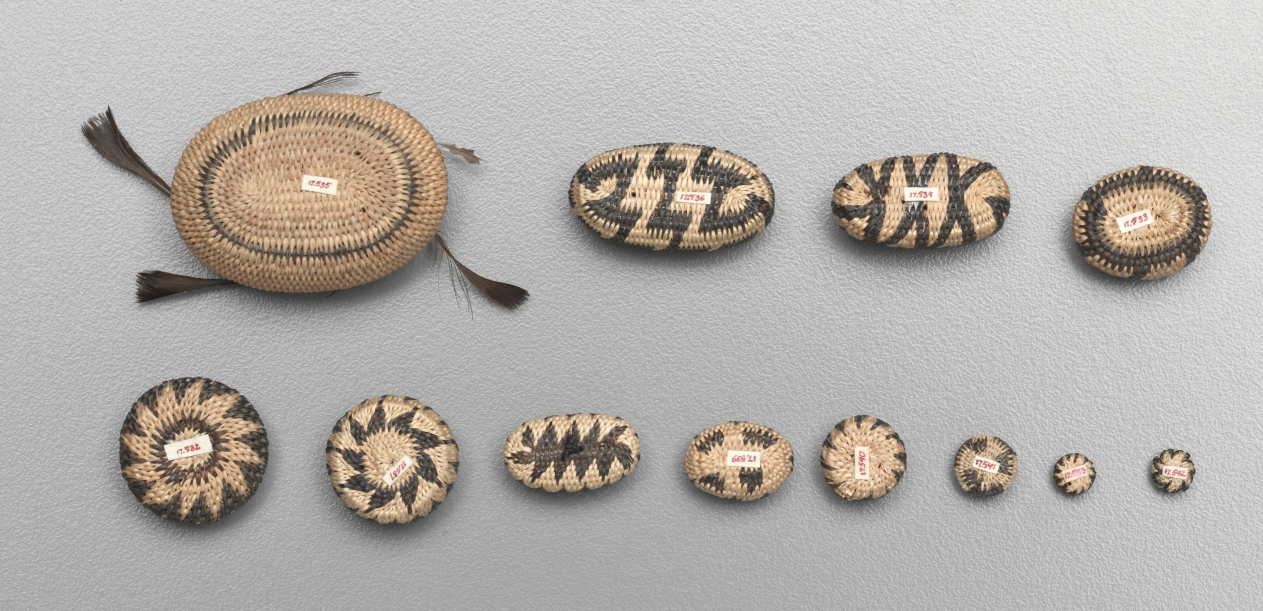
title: Miniature Oval Basket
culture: California, Pomo, late 19th-early 20th century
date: late 1800s-early 1900s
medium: plant materials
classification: Basketry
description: Miniature baskets were made to demonstrate the basket-maker’s virtuoso skill, and these tiny marvels seem to be no exception—the smallest are just a few millimeters wide but still patterned. For such fine work, dexterity was required as much for preparation of materials as for weaving.